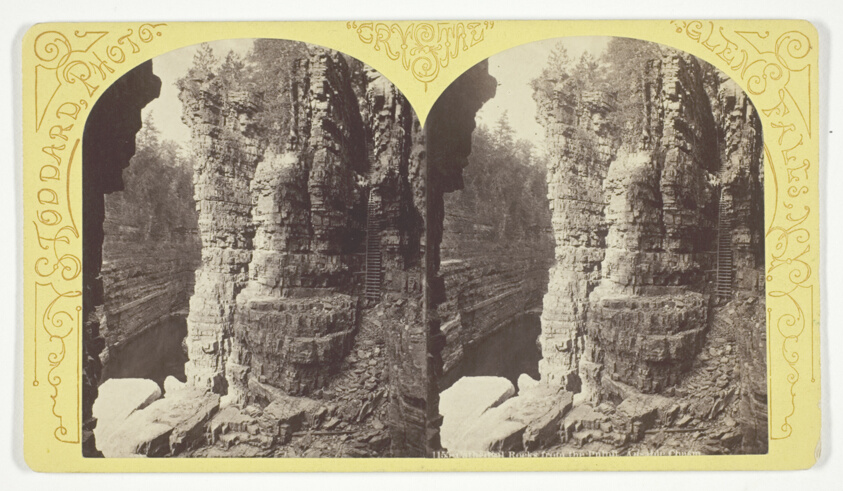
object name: Photograph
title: Cathedral Rocks from the Point, Ausable Chasm, No. 1155 from the series "Crystal"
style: 19th century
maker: Seneca Ray Stoddard (American, 1844-1917)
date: 1870/76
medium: Albumen print, stereo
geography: Glens Falls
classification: photography; photograph